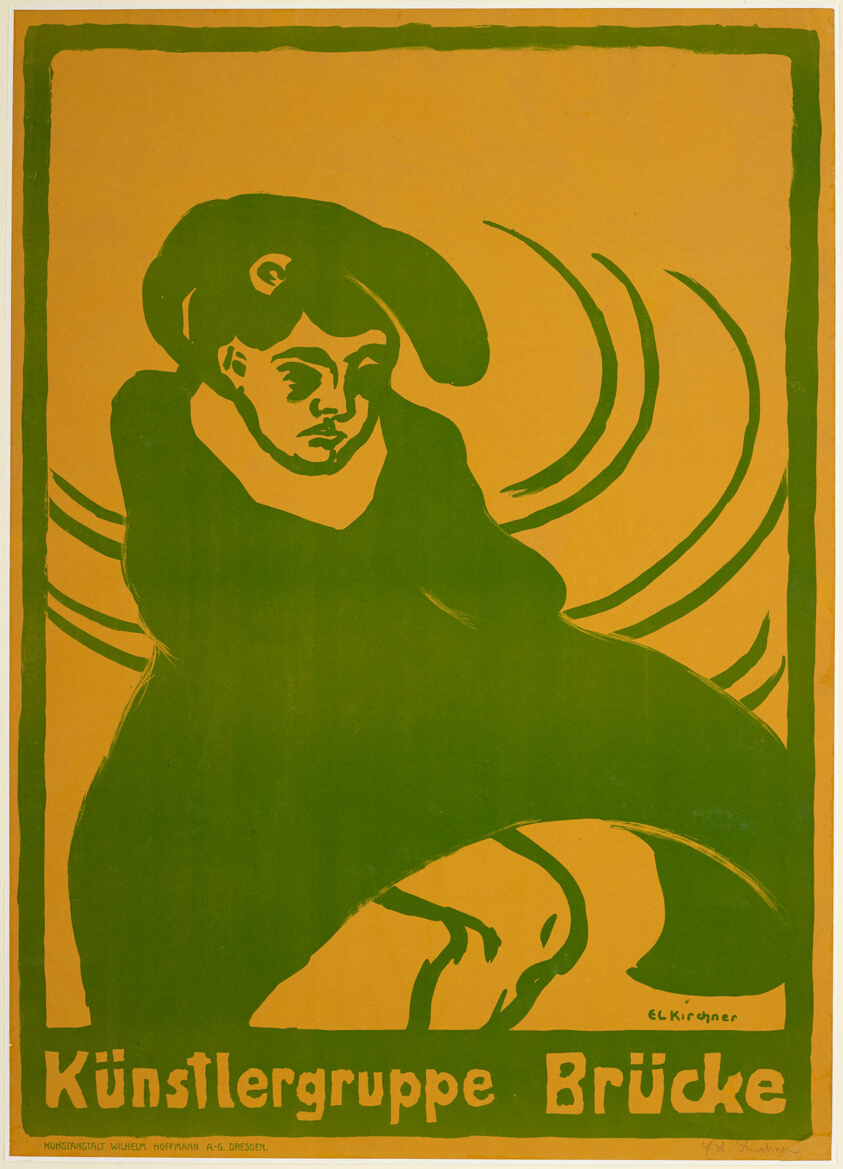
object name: Print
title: Poster for Die Brücke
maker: Ernst Ludwig Kirchner (German, 1880-1938)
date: 1907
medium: Lithograph in green and gold on paper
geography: Germany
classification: lithograph; print; prints and drawing